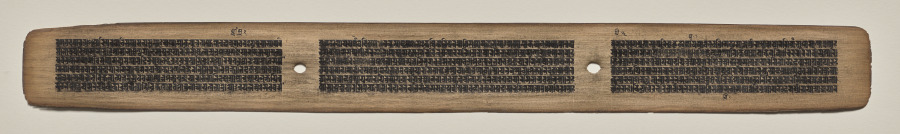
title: Text, Folio 63 (recto), from a Manuscript of the Perfection of Wisdom in Eight Thousand Lines (Ashtasahasrika Prajnaparamita-sutra)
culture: Eastern India, Bihar, Vikramashila Monastery. Painting: Nepal, Kathmandu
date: Sunday, September 14, 1119 (year 239 of the Newar Samvat in the month of Ashvina)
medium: gum tempera and ink on palm leaves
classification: Painting